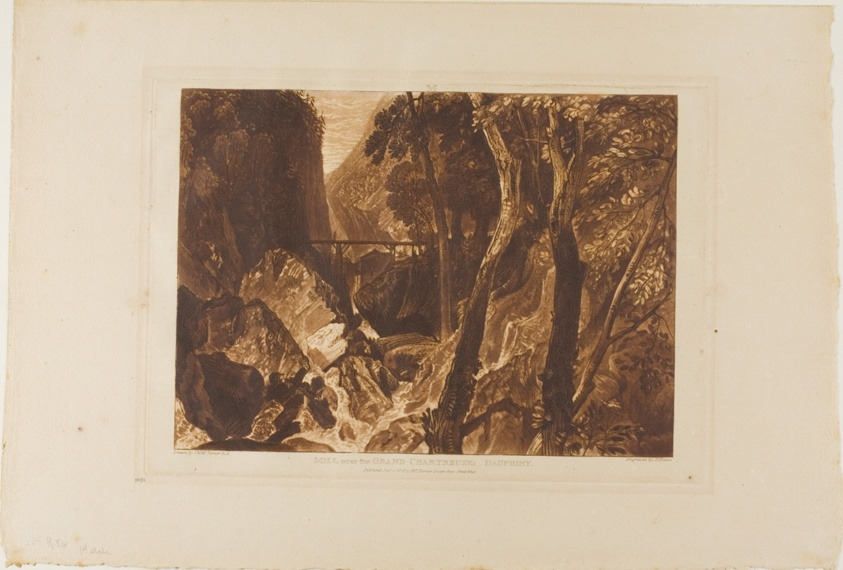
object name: Print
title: Mill near the Grand Chartreuse, plate 54 from Liber Studiorum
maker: Joseph Mallord William Turner (English, 1775-1851); Engraved by H. Dawe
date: published January 1, 1816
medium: Etching and engraving in brown on buff paper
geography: England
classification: etching; print; prints and drawing